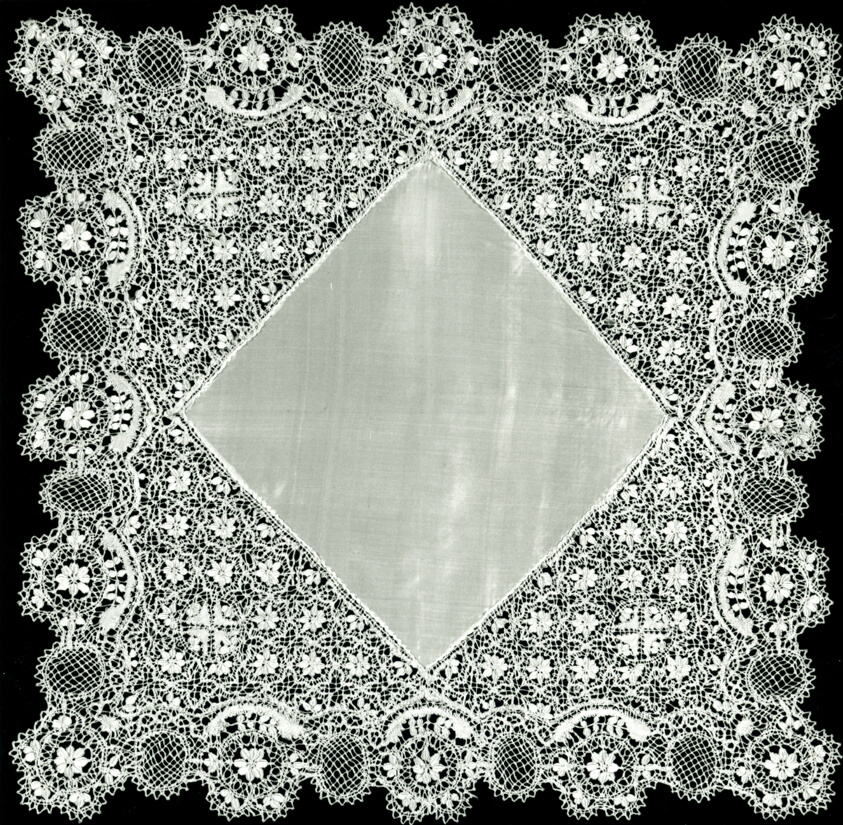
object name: Textile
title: Collar and Handkerchief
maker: Malta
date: 1875/1900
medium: Silk, bobbin straight lace (in strips); b: silk, plain weave; edged with silk, bobbin straight lace (in strips)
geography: Malta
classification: textile; lace - bobbin; lace